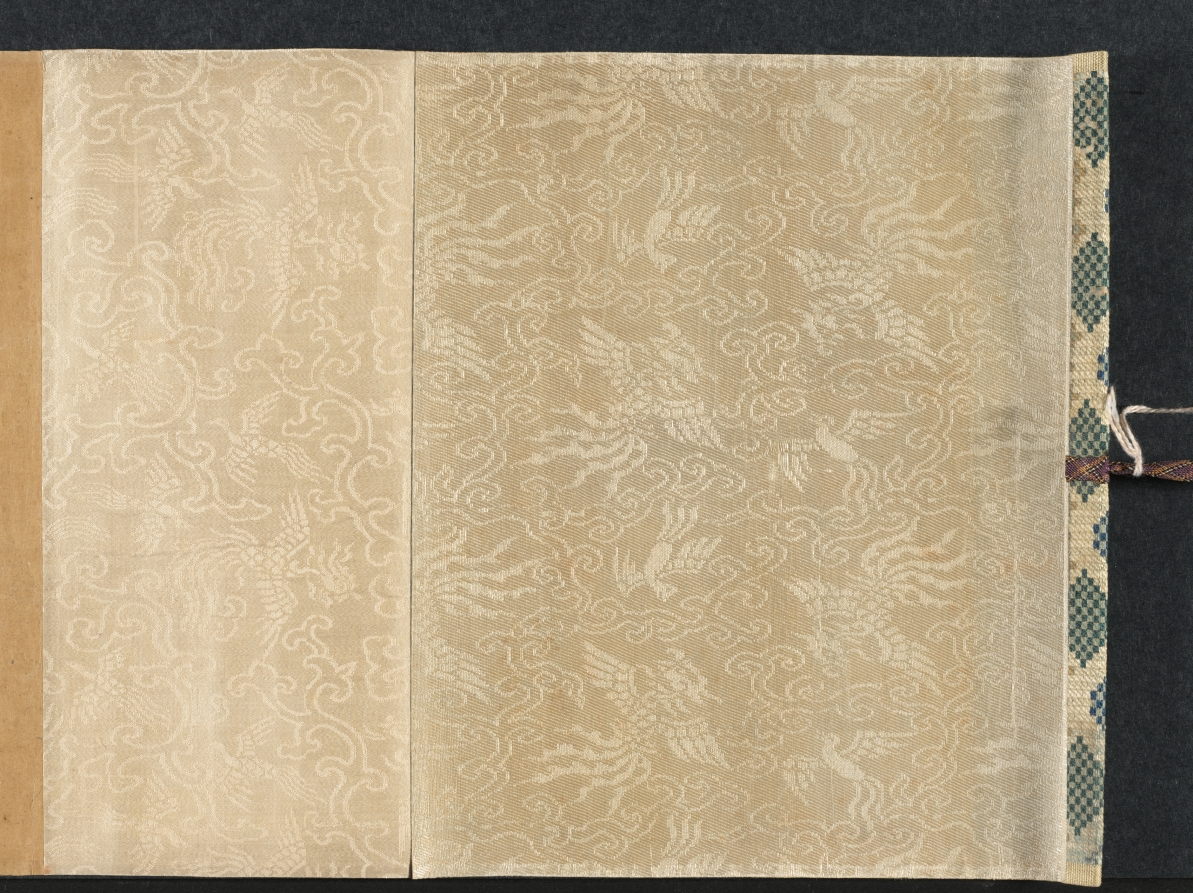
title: Zhao Mengfu Writing the Heart (Hridaya) Sutra in Exchange for Tea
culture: China, Ming dynasty (1368–1644)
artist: Qiu Ying (Chinese, 1494–1552)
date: 1542–43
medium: handscroll, ink and light color on paper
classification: Painting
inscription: Inscription accompanying text of "Heart" sutra, by Wen Zhengming 文徵明 (1470-1559): Zhengming 徵明, written in a boat at Kunshan 崑山, on the twenty-first day of the ninth month, in the renyin 壬寅 year, the twenty-first year of the Jiajing era [1542].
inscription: Colophon by Wang Shih-mou: Chou Yü-shün [Feng-lai] of K'un-shan was a scholarly, refined connoisseur of antiquities. He had acquired the poem written by Chao Ch'eng-chih [Chao Meng-fu] about the exchage of tea for Chao's calligraphy of the Prajna sutra. But the sutra itself, also written by Chao Meng-fu, is lost. He therefore asked Ch'iu Shih-fu [Ch'iu Ying] to do a painting and had Wen Cheng-ming, the artist-in-attendance, write the Hridaya Sutra in the "small, regular" style for replacement. Both works are so excellent that even Chao Meng-fu himself would certainly applaud if he should be reborn to see them. I, Shih-mou, had gotten possession of this scroll from the family of Chou Yü-shün, and since it was so wonderfully matched with one of the treasures in my collection. the Hridaya Sutra written by Chao Meng-fu for Priest Li in "running script," like the reuniting of two halves of a jade pi, I completed the scroll with the several colophons written for the "tea-exchange" poem. I did this because the painting of Ch'iu Ying and the calligraphy of Wen Cheng-ming are definitely masterpieces by themselves with absolutely no need to depend on any of the colophons written for the Chao Meng-fu poem. Furthermore, the two sons of Wen Cheng-ming, Shou-ch'eng [Wen P'eng] and Hsiu-ch'eng [Wen Chia]. have each written a colophon explaining the reason for replacing the calligraphy. As their writings are both acceptable for high standard, I didn't want to throw them away. [So by separating these into two scrolls] I was able to get two complete works of art in one clever stroke. I was quite pleased with myself, and hope that those who see this scroll shall not get suspicious because of the missing colophons. Wang Shih-mou wrote in his Jih-sun-chai study, on the first day of the tenth month, in the chia-shen year of the Wan-li era [1584].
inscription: Colophon by Wen P'eng: I-shao [Wang Hsi-chi] wrote in exchange for a flock of geese. Su Tung-po wrote in exchange for meat. Both episodes have become legends of a thousand years. Sung-hsüeh [Chao Meng-fu] "teased" Priest Kung for tea, and the story was immediately immortalized in the poems by all the famous scholars of the times. Indeed, how could one say his humor and elegance are not equal to the ancient worthies? Unfortunately, the poetry has survived but the writing of the sutra is lost. Yü-shün [Chou Feng-lai] therefore asked my father to make up the writing and so here is the complete work of art. Respectfully inscribed by Wen P'eng in the mid-summer of 1543.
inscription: Colophon by Wen Chia: Sung-hsüeh [Chao Meng-fu], in exchanging tea leaves for his writing of the Prajna, had put himself in the company of Yu-chün [Wang Hsi-chih] who exchanged geese for his writing of the Huang-t'ing sutra [the Yellow Chamber, or the Wai-ching ching, a Taoist text attributed to the Yellow Emperor]. However, was this romantic and cultivated gesture really intended for such small things? Actually, he was only proud that the excellence of his calligraphy had made him worthy to be the successor of the Ch'in Dynasty master. Since, very unfortunately, Chao Meng-fu's writing [of the Prajna] was already lost, my father therefore agreed to replace it, and did the calligraphy in the style of the Yellow Chamber. In addition, Yu-shün [Chou Feng-lai] had asked Mr. Ch'iu Shih-fu [Ch'iu Ying] to do a painting of the sutra writing story in the style of Li Lung-mien at the head of the scroll. Now it would seem the entire episode should go down in history for immortality. Respectfully recorded by Wen Chia, on the eighth day of the eighth month, in the year of k'uei-mao [1543]. trans. WKH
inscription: 4 colophons and 23 seals: 1 colophon, dated 1543, and 2 seals of Wen Peng (1498-1573); 1 colophon, dated 1543, and 2 seals of Wen Chia (1501-1583); 1 colophon, dated 1584, and 3 seals of Wang Shih-mou (1536-1588); 2 seals of Chou Feng-lai (16th c.); 3 seals of Sung Lo (1634-1713); 5 seals of the Ch'ien-lung emperor (r. 1736-95); 1 colophon, dated 1902, and 1 seal of Fei Nien-tz'u (1885-1905); 4 seals of Wan-go H. C. Weng (b. 1918); 1 seal unidentified.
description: The Yuan dynasty calligrapher Zhao Mengfu (1254–1322) is said to have transcribed the Heart Sutra for a certain priest named Li in exchange for tea. Later, during the Ming dynasty, the professional painter Qiu Ying from Suzhou painted this scene for his patron. Here, Zhao Mengfu holds a brush and has a piece of paper laid out before him. On the table is an ink stone, an ink stick, and a small water dropper. Drops of water would dissolve the ink stick into liquid ink when it was ground on the flat square stone.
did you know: Qiu Ying was born to a peasant family, but his natural talent led him to a successful career as a professional painter with wealthy patrons.